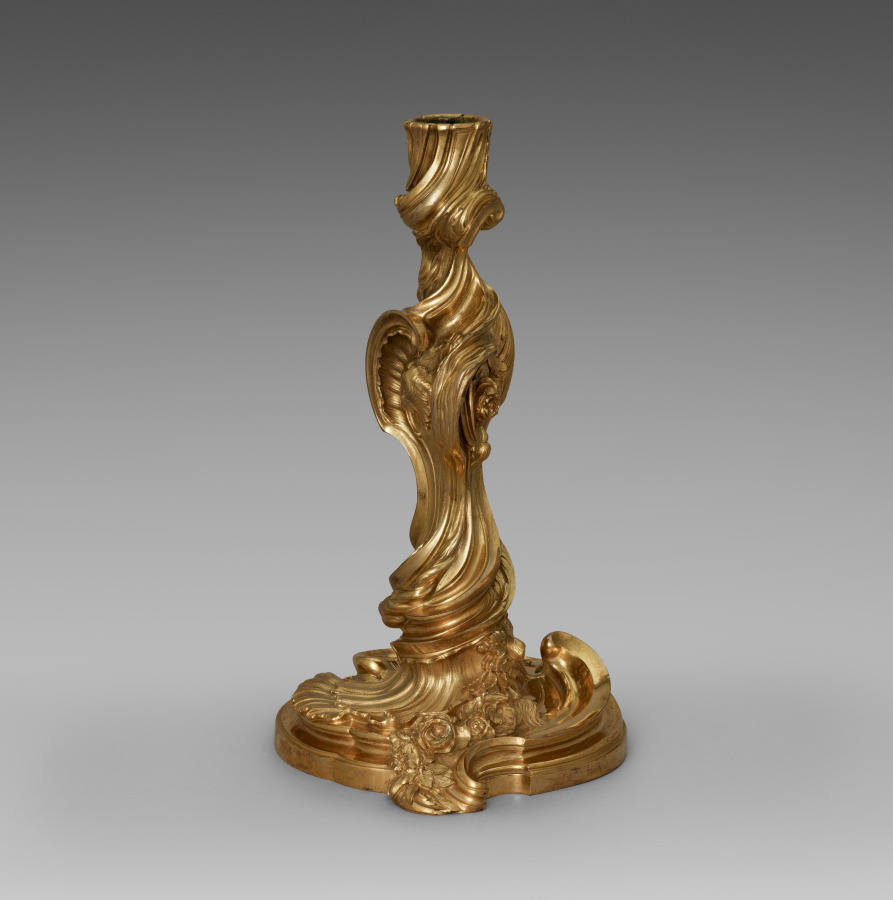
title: Candlestick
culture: France, 18th century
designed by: Juste-Aurèle Meissonnier (French, 1695–1750)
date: c. 1740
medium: gilt metal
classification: Furniture and woodwork